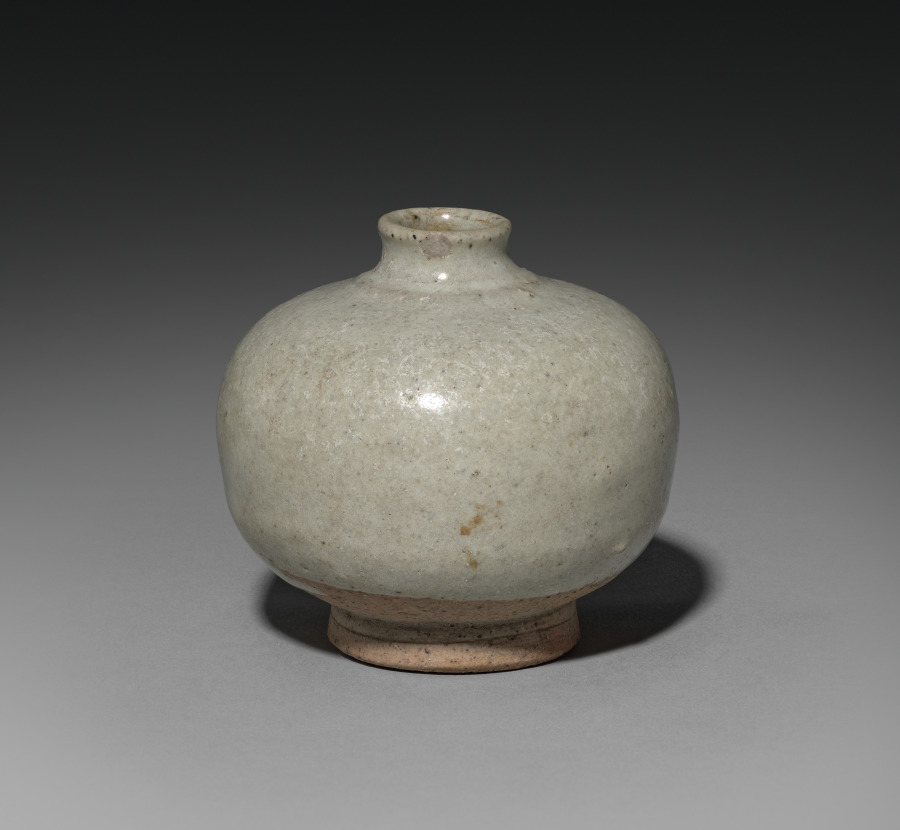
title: Bottle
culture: Siam, Sawankhalok ware, late 13th-14th Century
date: late 1200s-1300s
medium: stoneware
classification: Ceramic